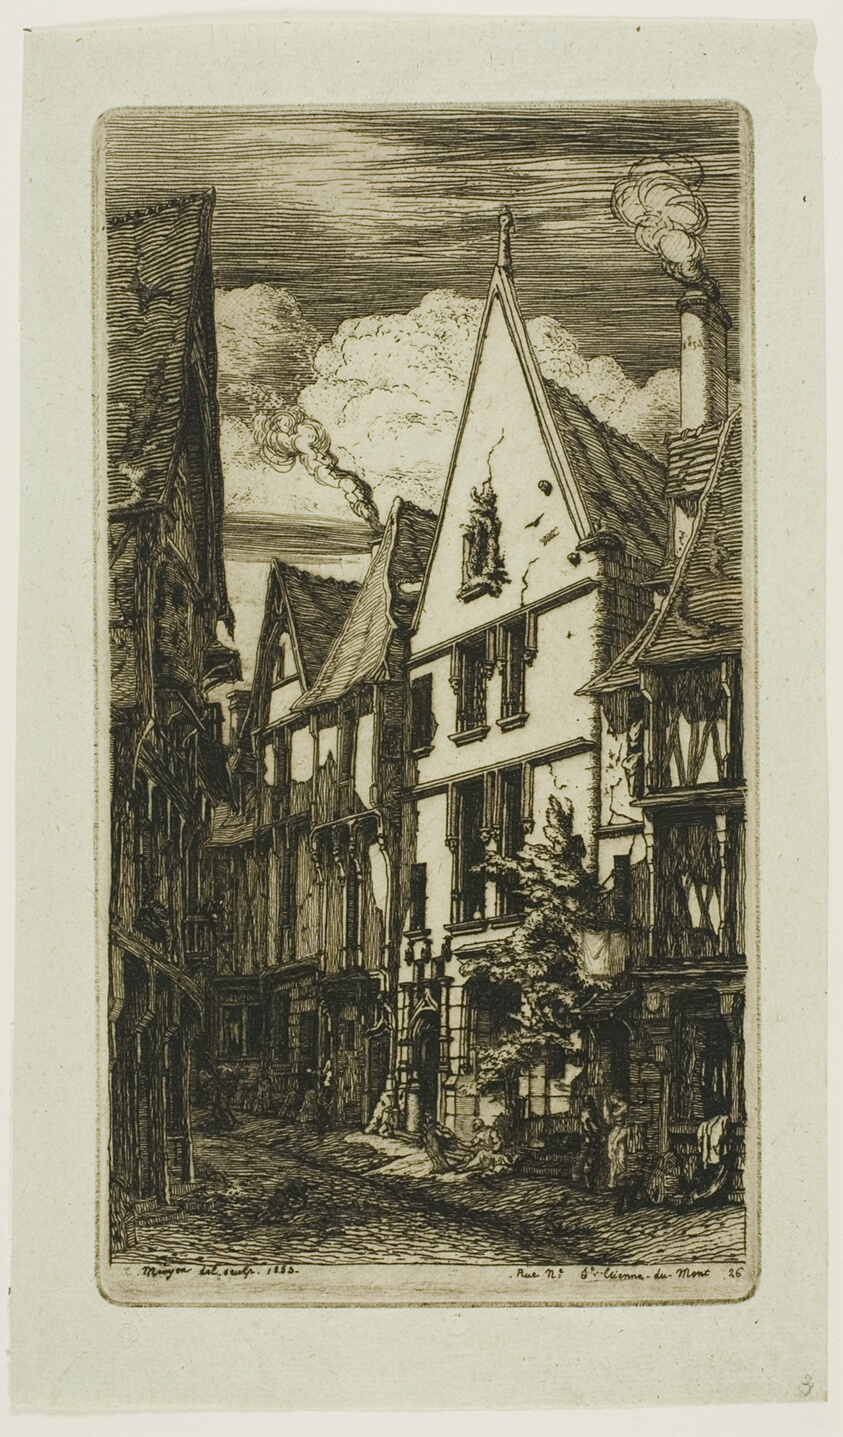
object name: Print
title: Rue des Toiles, Bourges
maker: Charles Meryon (French, 1821-1868)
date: 1853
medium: Etching and drypoint on verdâtre (greenish) laid paper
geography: France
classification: etching; print; prints and drawing